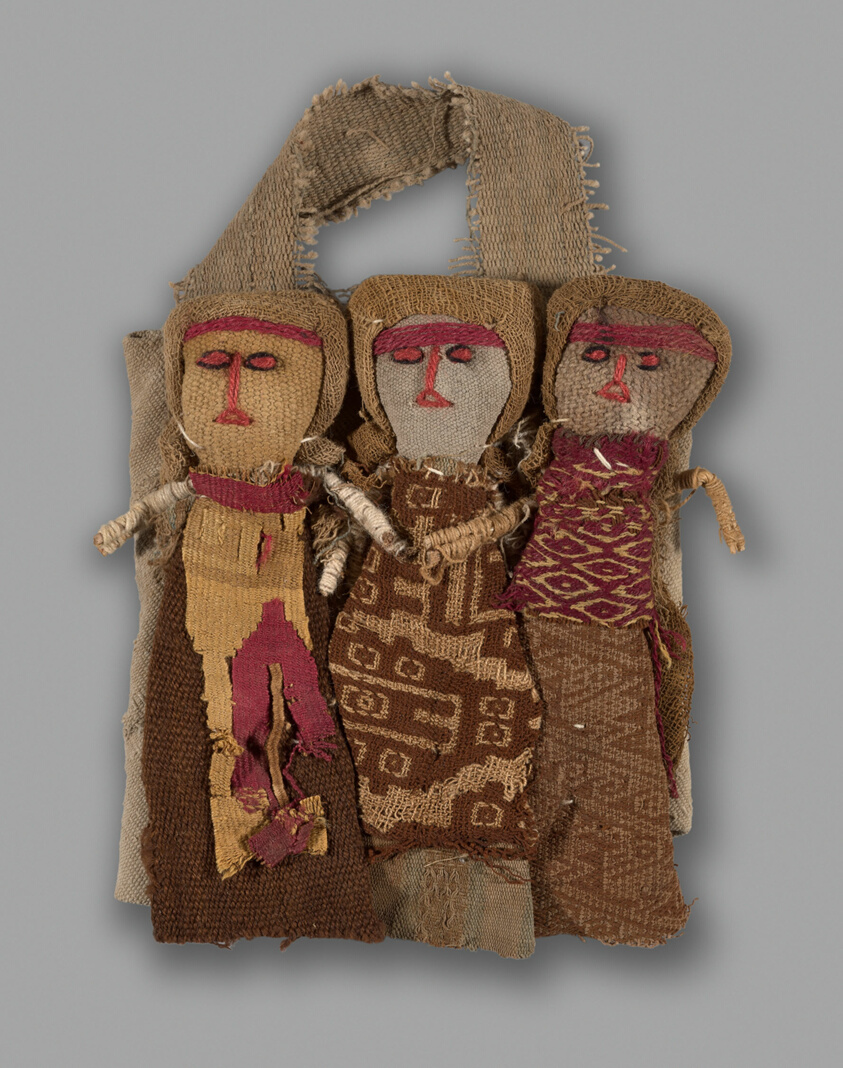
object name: Decorative Arts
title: Dolls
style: chancay, peruvian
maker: Chancay (Peru)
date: 1950/84, with textile fragments from A.D. 1000/1476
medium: Contemporary assemblage of materials from a variety of past cultures. Cotton and wool, variety of weaves' embroidered with wool in satin and back stitches; cotton wrapped twigs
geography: Peru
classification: textile; accessories (object genre); dolls (figurines); decorative arts